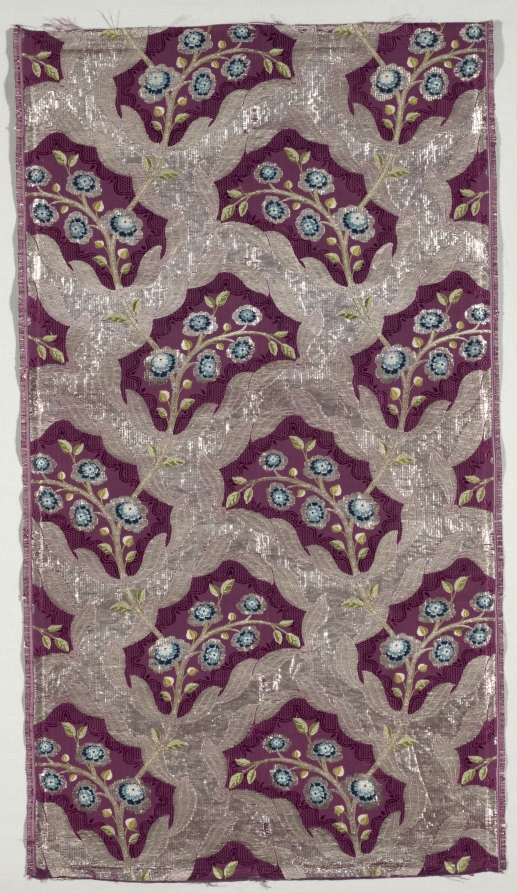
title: Length of Textile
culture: France, 18th century, Period of Louis XV (1723-1774)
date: 1723–1774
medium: brocade; silk and metal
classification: Textile